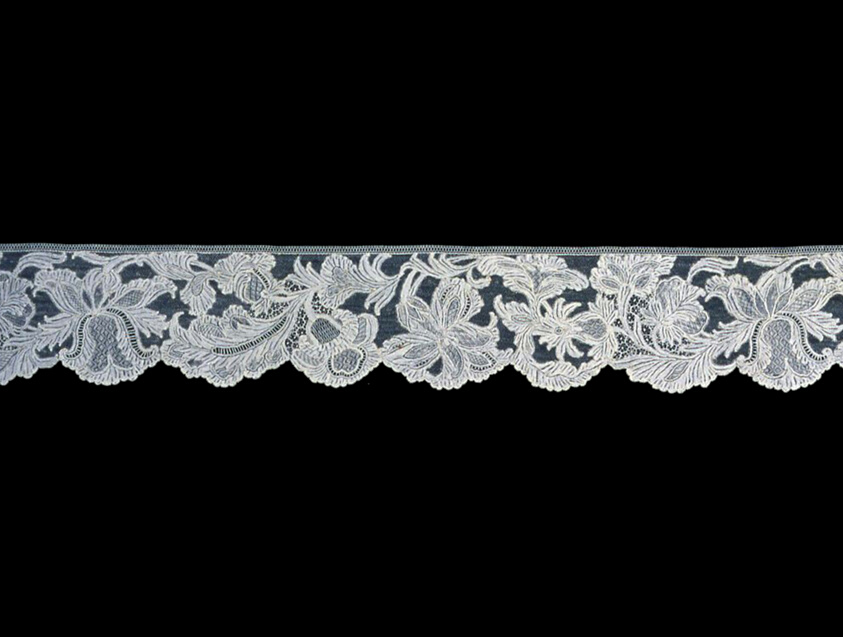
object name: Textile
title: Border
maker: Belgium, Flanders, Brussels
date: 1730s/40s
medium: Linen, needle lace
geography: Flanders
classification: textile; lace - needle; lace